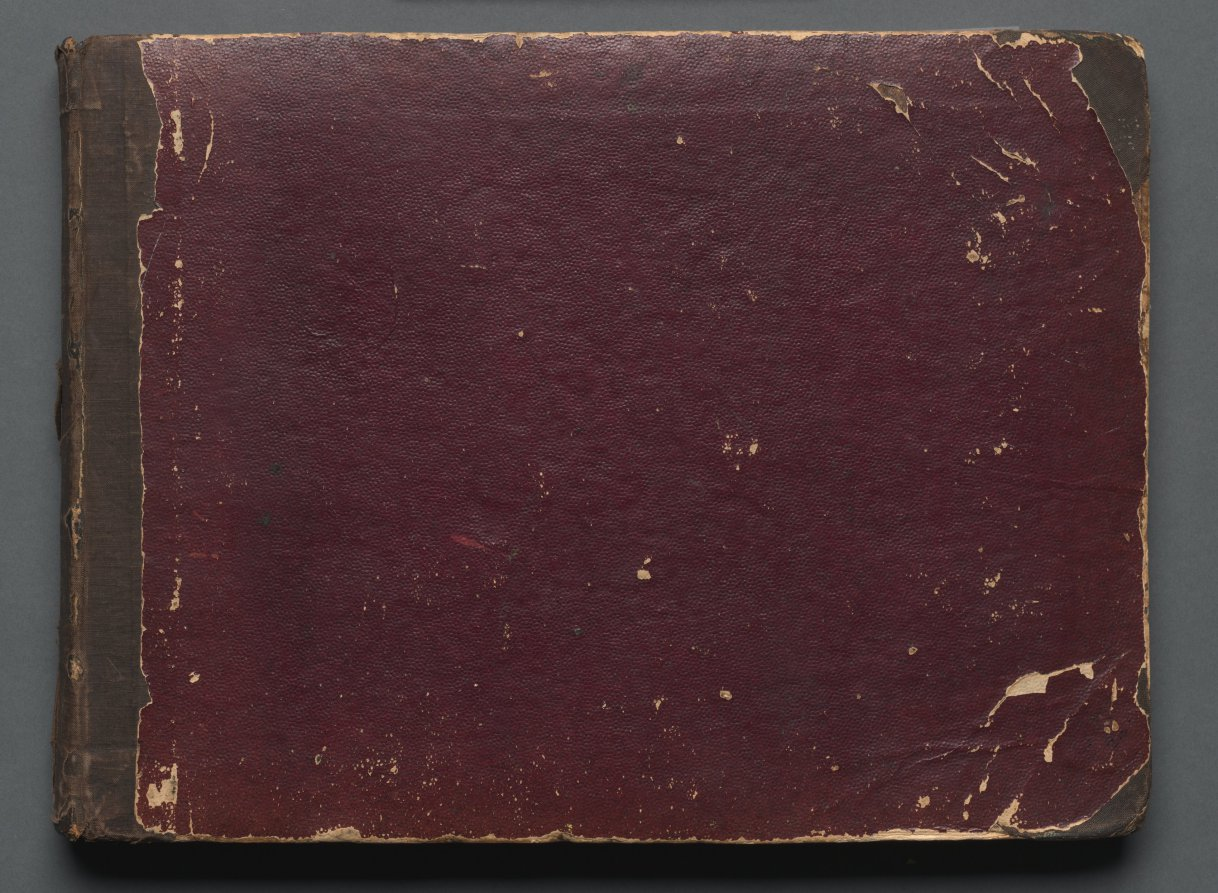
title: Album with Views of Rome and Surroundings, Landscape Studies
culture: Germany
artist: Franz Johann Heinrich Nadorp (German, 1794–1876)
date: c. 1830s-70s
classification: Bound Volume